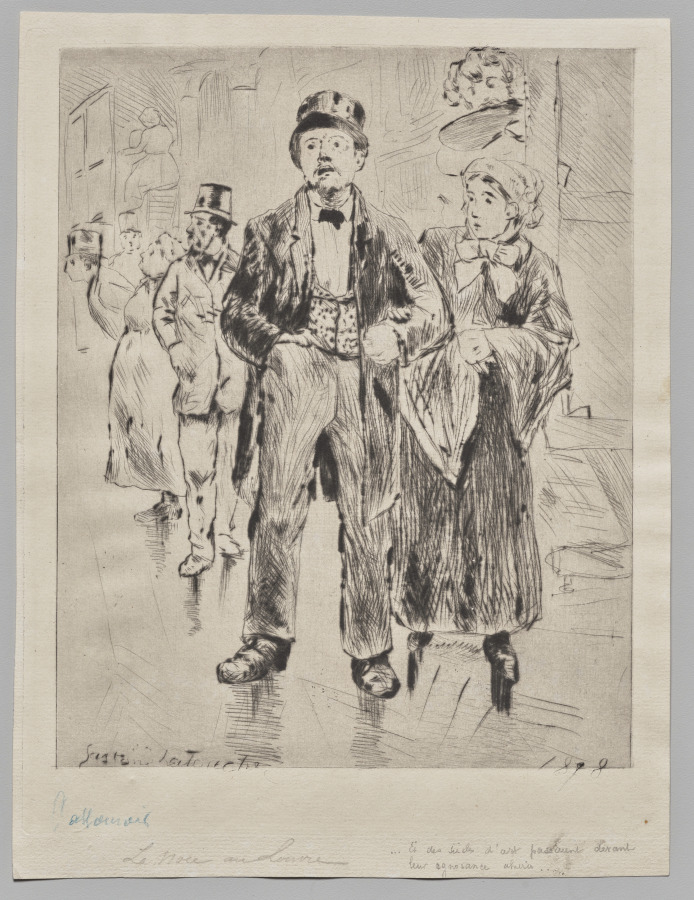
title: Wedding at the Louvre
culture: France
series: L'Assommoir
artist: Gaston de Latouche (French, 1854–1913)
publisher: Cadart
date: 1878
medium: drypoint on laid paper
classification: Print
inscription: Signed, in plate, at lower left: Gaston La Touche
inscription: inscribed, in plate, at lower right: 1878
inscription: inscribed, in blue pencil, at lower left: l’assommoir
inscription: in pencil, at lower left: La noce au Louvre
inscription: in pencil, at lower right: …Et des siècles d’art passaient devant / leur ignorance ahurie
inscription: Watermark: D.C. BLAUW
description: Although his work changed throughout his career, early on Gaston La Touche belonged loosely to the Impressionist circle through his association with Édouard Manet. La Touche explored subjects—such as that seen here—taken from the lives of working-class Parisians. This print represents a scene from naturalist author Émile Zola’s novel L’Assommoir, which detailed the rise and fall of a laundress named Gervaise. La Touche is said to have collaborated with the author on the imagery and exhibited the entire series at the public Paris Salon in 1879.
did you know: Gaston La Touche completely changed the subjects and style of his work around 1890 and destroyed much of his early work.